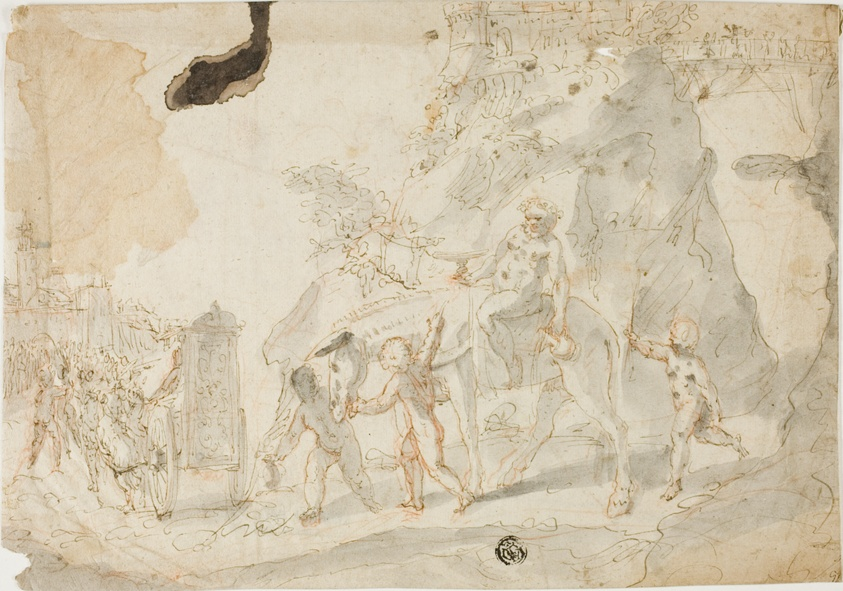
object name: Drawing and Watercolor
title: Triumph of Bacchus with Drunken Silenus on Donkey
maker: Cesare Pollini (Italian, c. 1560-c. 1630)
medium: Pen and brown ink and gray wash, over red chalk, on ivory laid paper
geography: Italy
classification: pen and ink drawings; drawings (visual works); prints and drawing